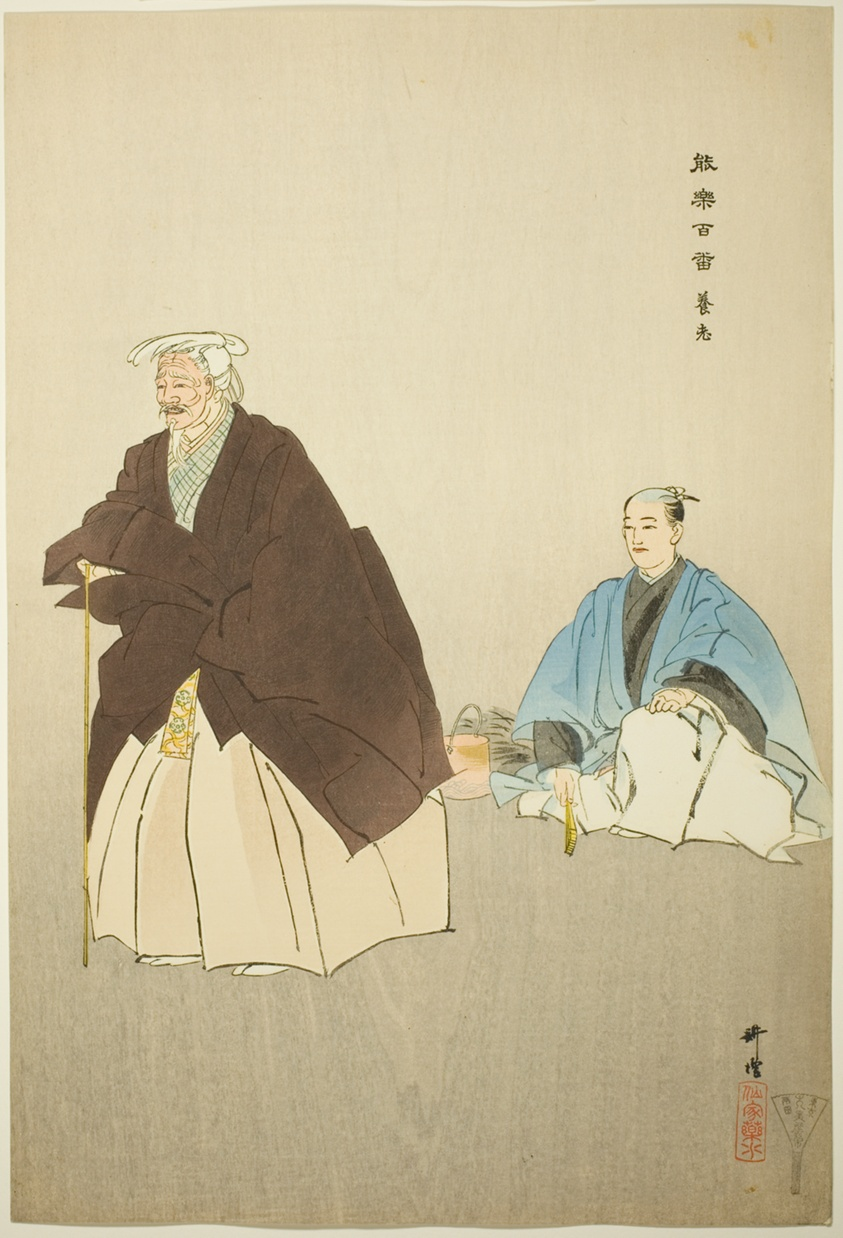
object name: Print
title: Yoro, from the series "One Hundred No Dramas (Nogaku hyakuban)"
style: Japanese (culture or style)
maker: Tsukioka Kogyo; Japanese, 1869-1927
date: 1898/1903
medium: Color woodblock print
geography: Japan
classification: woodblock print; print; asian art